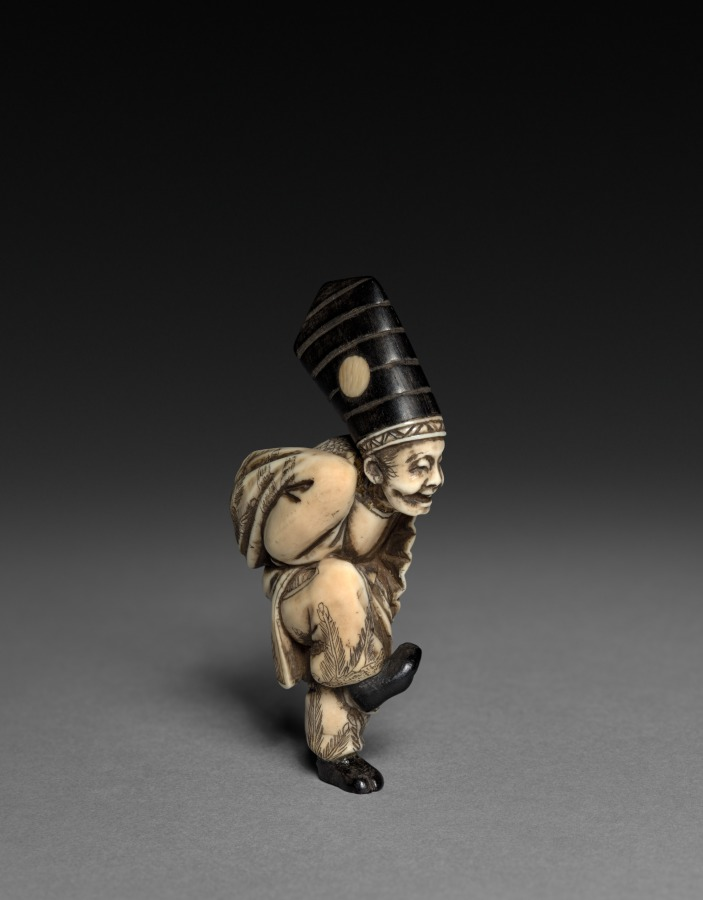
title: Dancing Man with Fan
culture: Japan, Edo period (1615–1868)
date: early to mid-1800s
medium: ivory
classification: Netsuke